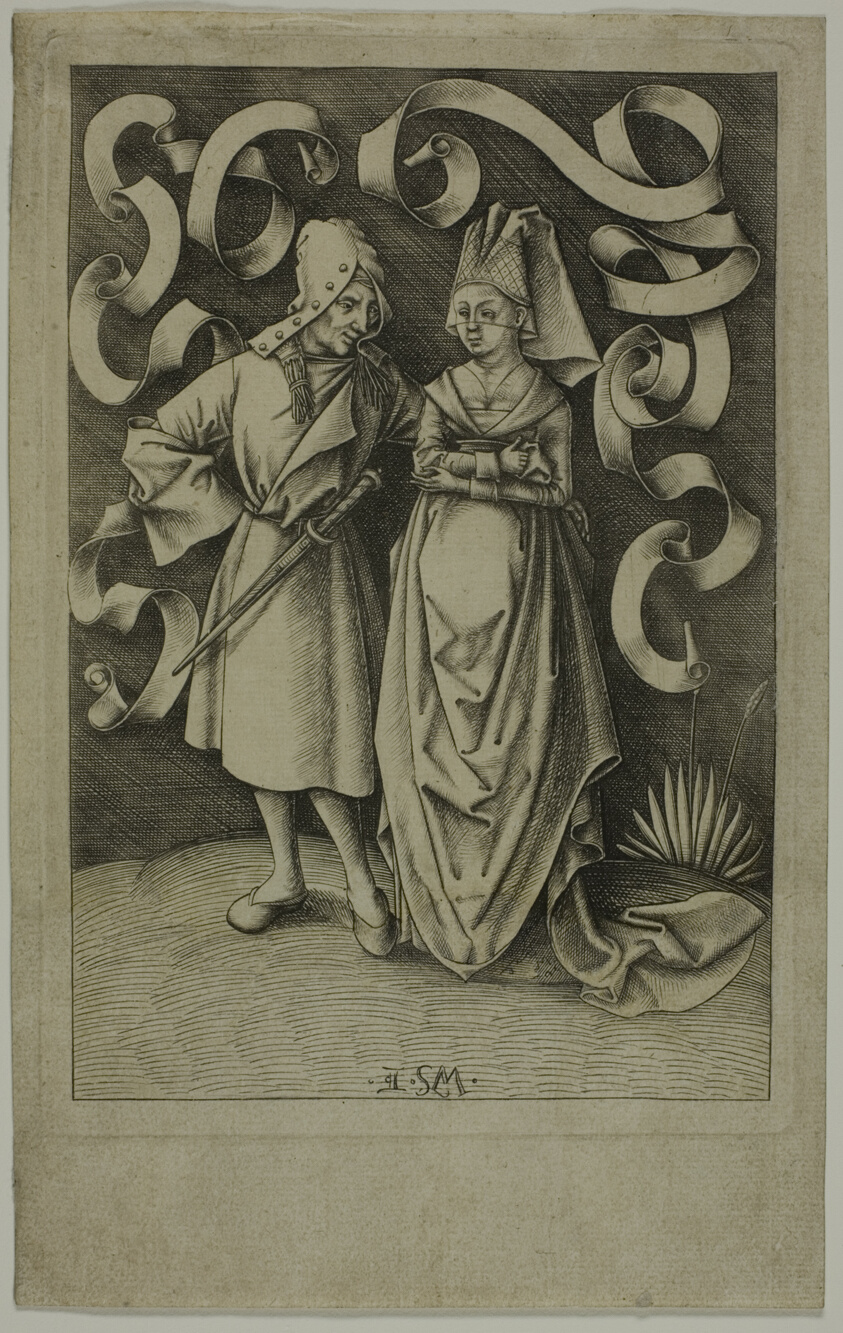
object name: Print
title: The Ill-Assorted Couple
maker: Israhel van Meckenem the Younger; German, c. 1440/45-1503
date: c. 1495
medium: Engraving on ivory laid paper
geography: Germany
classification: engraving; print; prints and drawing